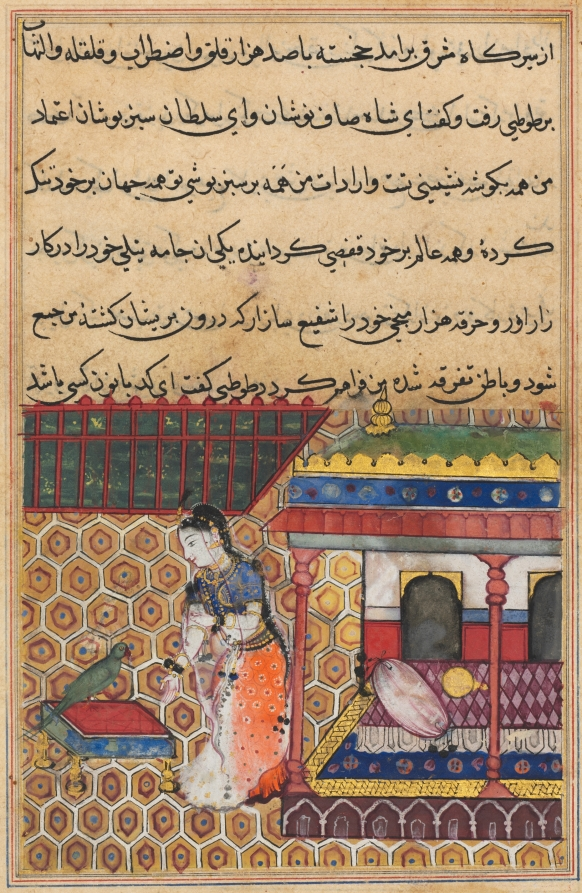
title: The parrot addresses Khujasta at the beginning of the thirty-eighth night, from a Tuti-nama (Tales of a Parrot)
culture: Mughal India, court of Akbar (reigned 1556–1605)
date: c. 1560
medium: gum tempera, ink, and gold on paper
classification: Painting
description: Before Khujasta can leave for a clandestine meeting with her lover, she is stopped by Tuti the parrot who begins to tell her the story of a group of small animals who joined together to overcome an elephant. By the time the parrot’s tale is over, the sun has risen and Khujasta is unable to leave.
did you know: A golden mirror lies on Khujasta’s bed.